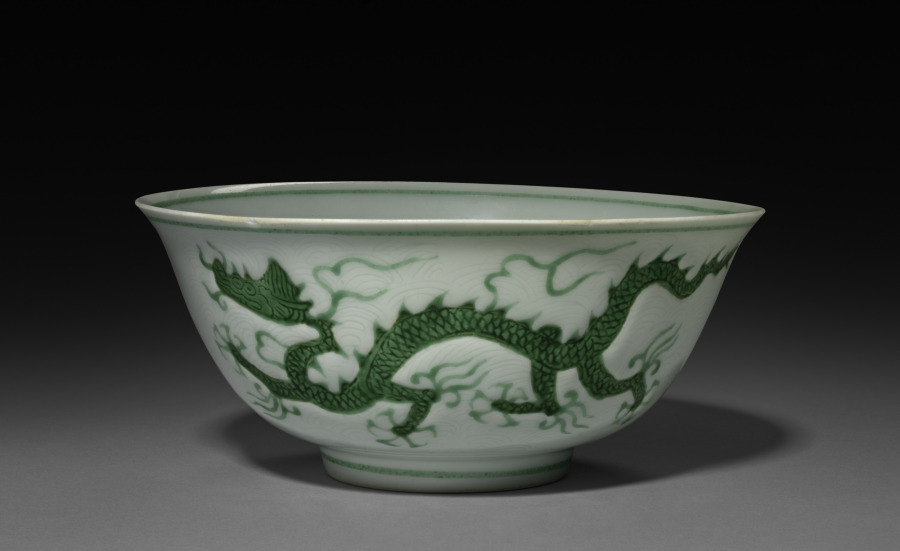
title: Bowl with Dragons in Waves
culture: China, Jiangxi province, Jingdezhen kilns, Ming dynasty (1368-1644), Zhengde mark and reign (1506-21)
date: 1506–21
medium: porcelain with incised decoration and green overglaze enamel and resist enamel decoration on biscuit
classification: Ceramic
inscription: 大明正德年製